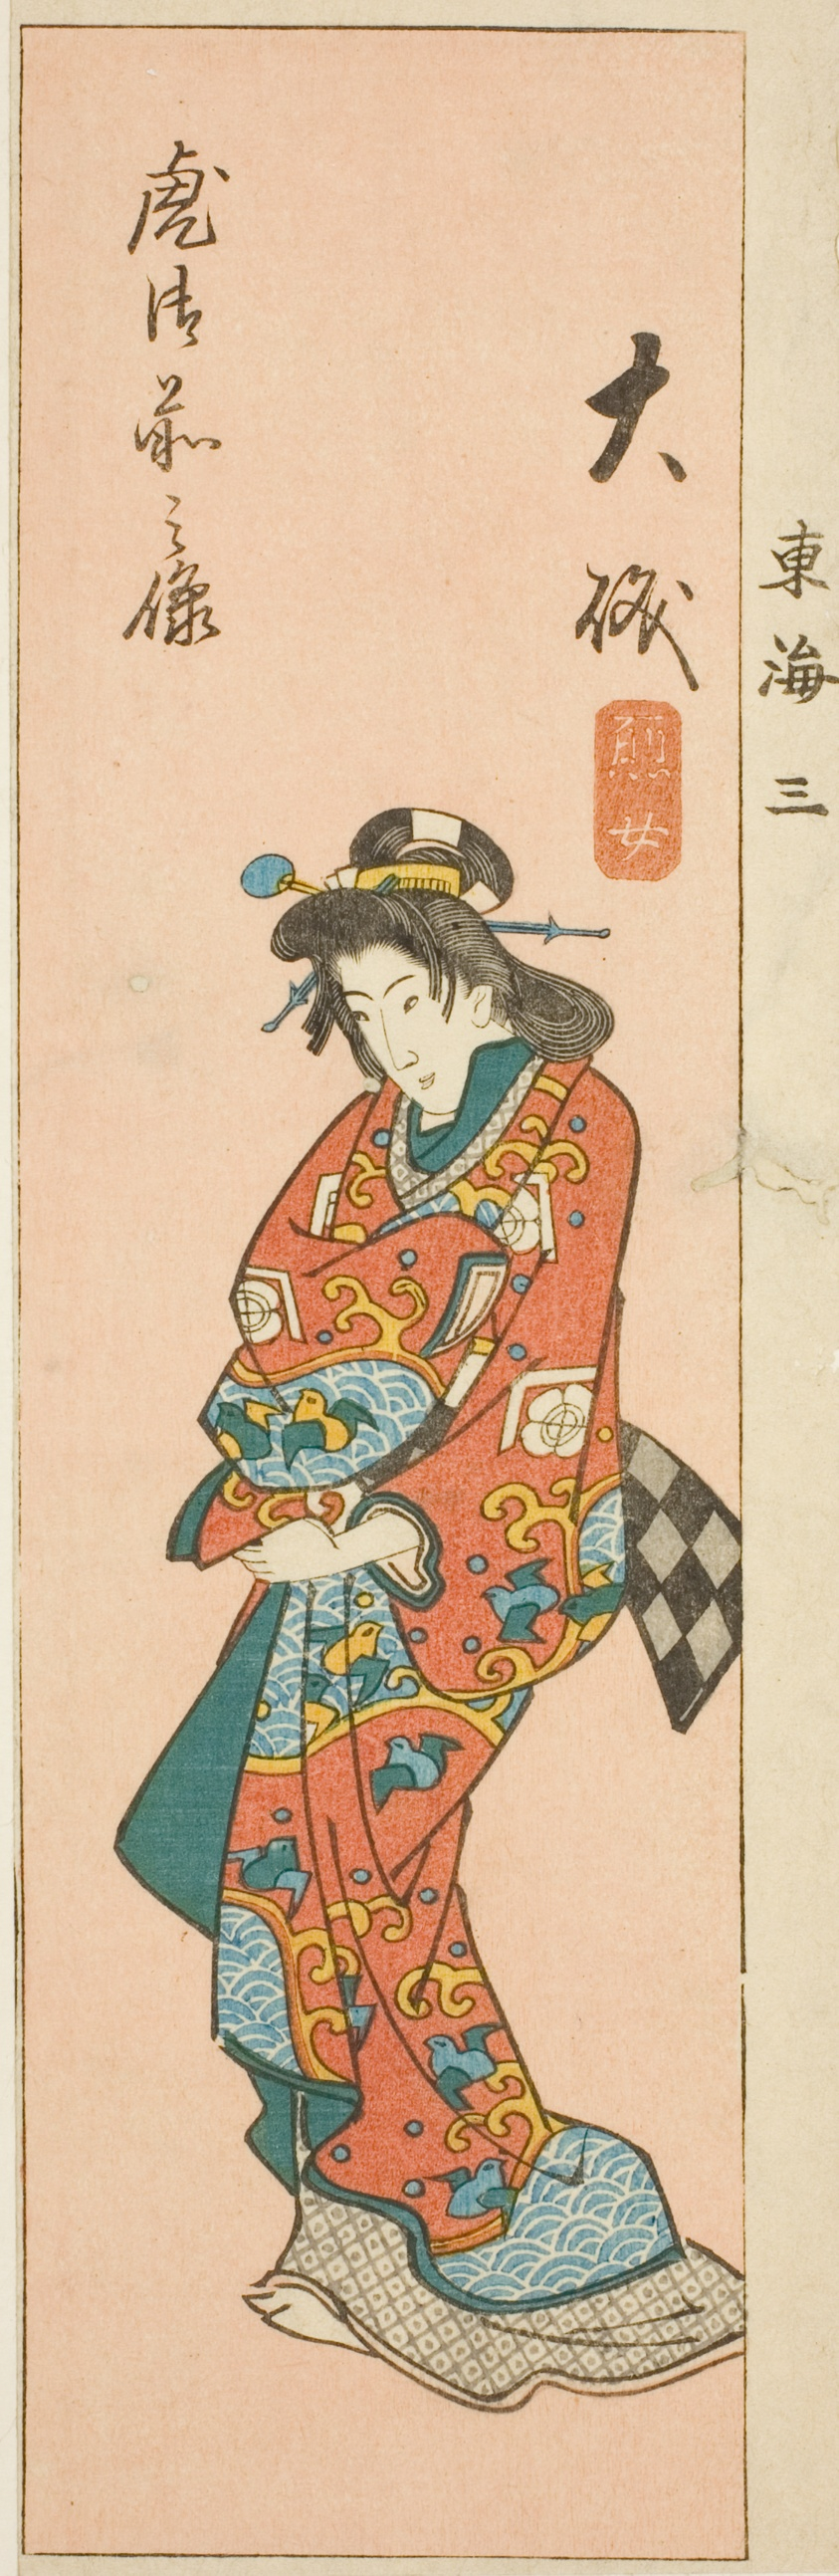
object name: Print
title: Oiso, section of sheet no. 3 from the series "Cutout Pictures of the Tokaido (Tokaido harimaze zue)"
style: Japanese (culture or style)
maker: Utagawa Hiroshige 歌川 広重; Japanese, 1797-1858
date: c. 1848/52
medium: Color woodblock print; section of harimaze sheet (uncut sheet: 1939.1291)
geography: Japan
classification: woodblock print; print; asian art